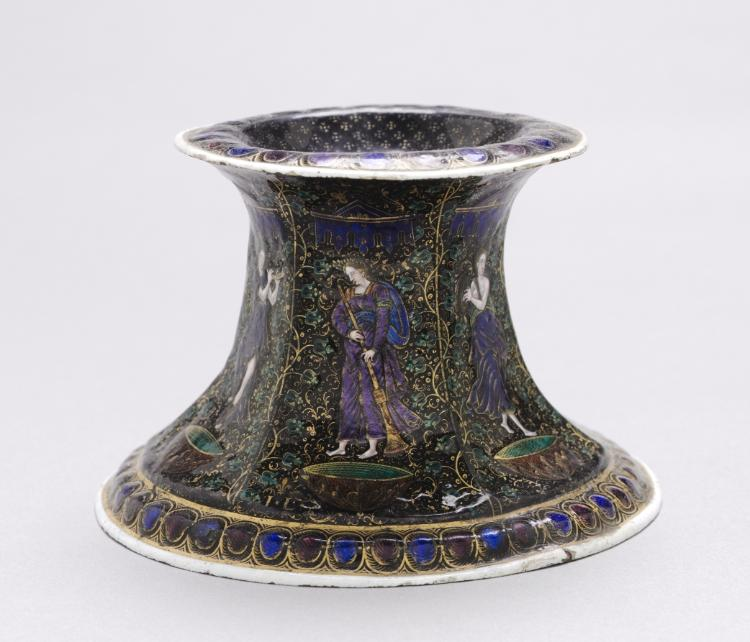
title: Salt Dish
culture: France, Limoges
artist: Jean Limousin (French, 1528–c. 1610)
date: early 1600s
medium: painted enamel on copper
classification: Ceramic